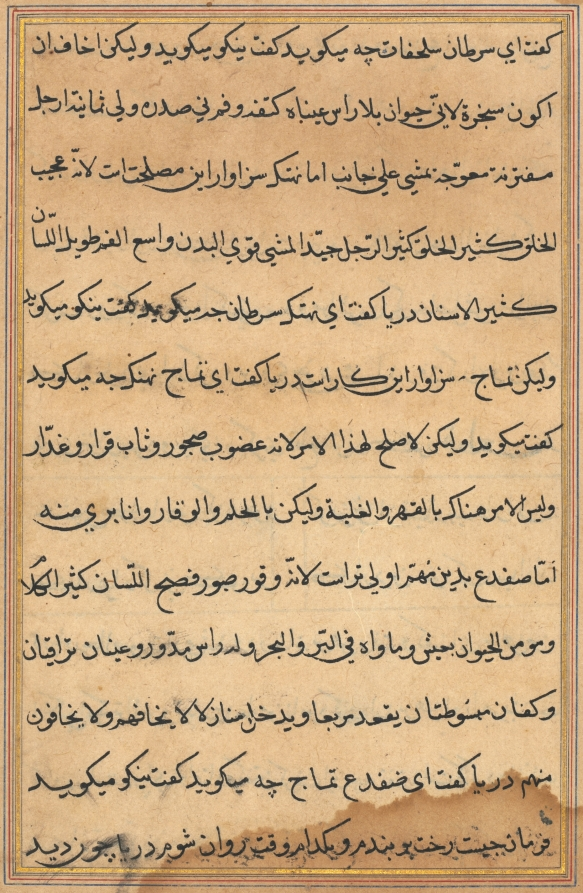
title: Page from Tales of a Parrot (Tuti-nama): text page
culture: Mughal India, court of Akbar (reigned 1556–1605)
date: c. 1560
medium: gum tempera, ink, and gold on paper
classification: Painting